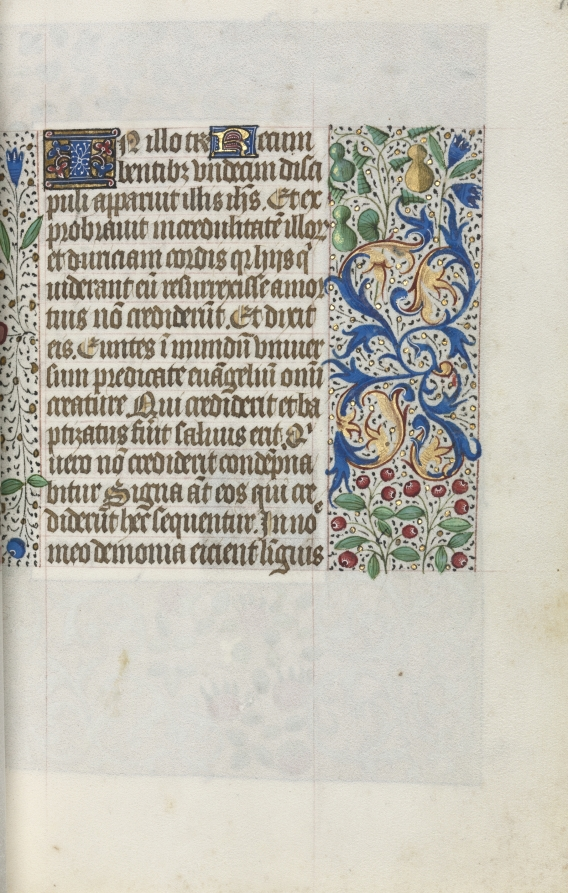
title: Book of Hours (Use of Rouen): fol. 18r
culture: France, Rouen, 15th century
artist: Master of the Geneva Latini (French, active Rouen, 1460–80)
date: c. 1470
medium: ink, tempera, and gold on vellum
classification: Bound Volume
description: In the late 1400s and early 1500s Rouen was an established and important center of book production. The city’s cathedral had a wealthy chapter that spent large sums of money to commission books and to maintain its extensive library. The stationers and booksellers would have likely been concentrated in or near the cathedral precinct. This artist, named after a manuscript now in Geneva, was Rouen’s principal illuminator during the second half of the 1400s.